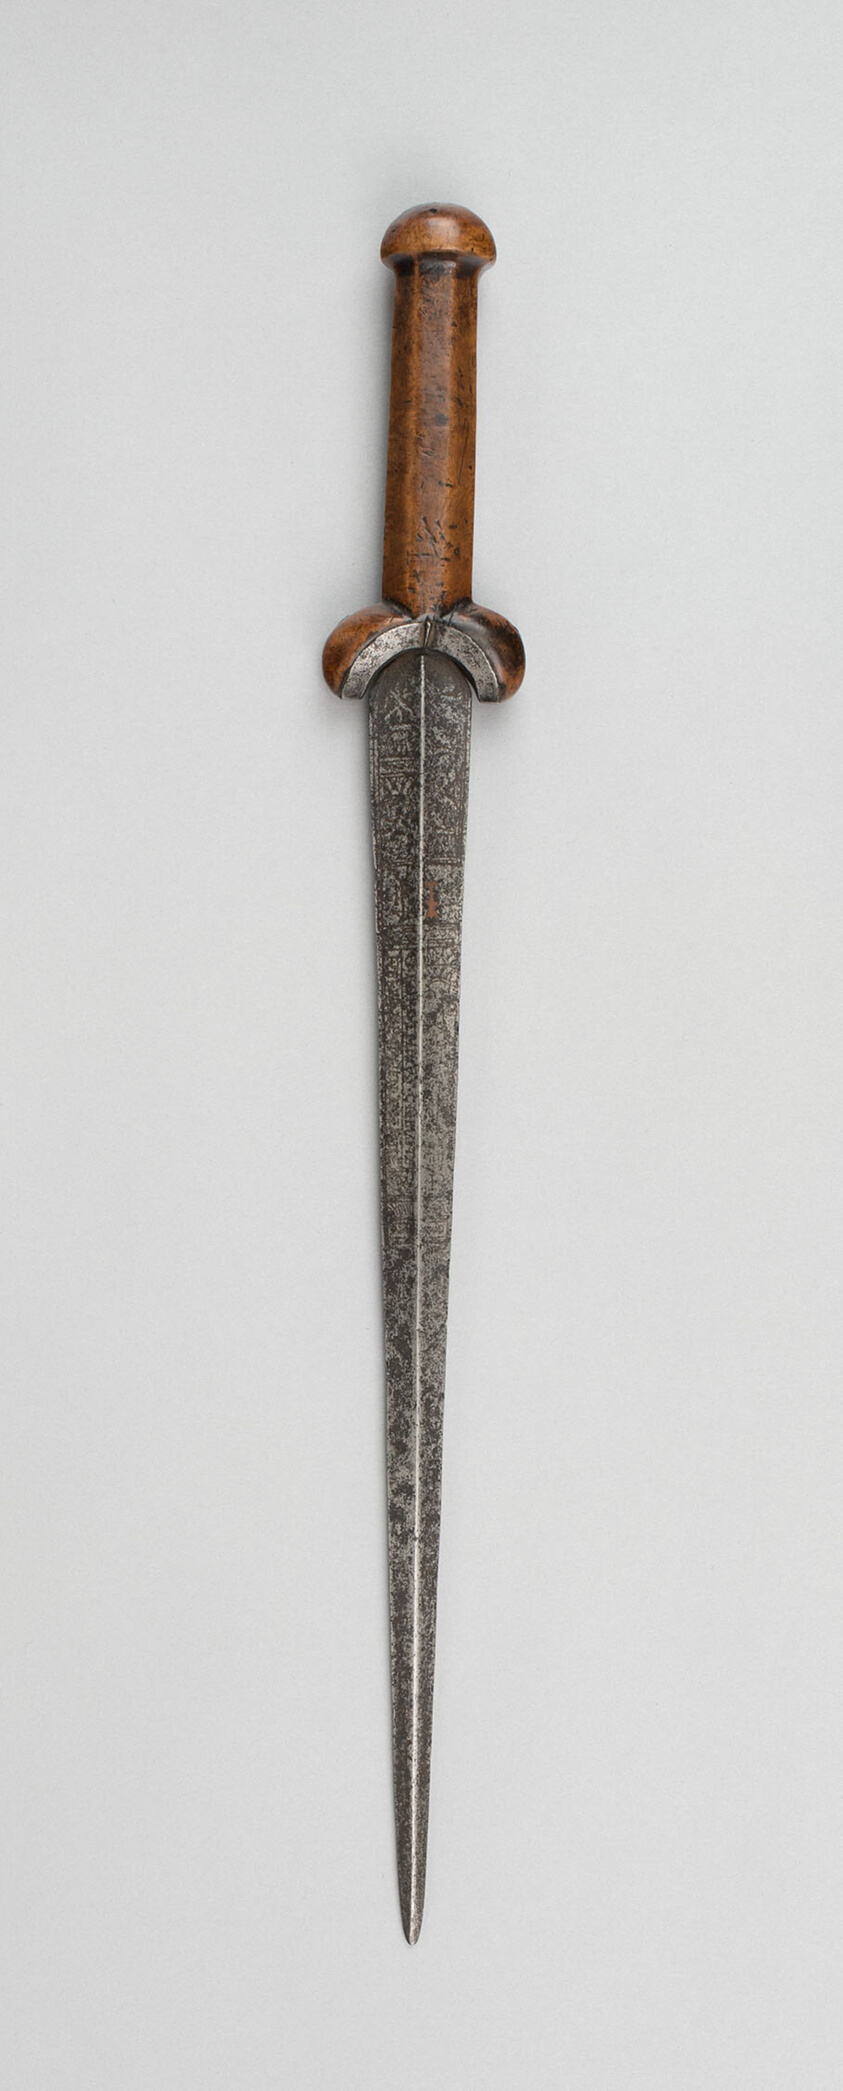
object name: Arms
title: Ballock Dagger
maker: Scottish, Lowlands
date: early 17th century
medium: Ivy root, iron, and copper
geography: Scotland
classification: edged weapon-dagger; arms; arms and armor